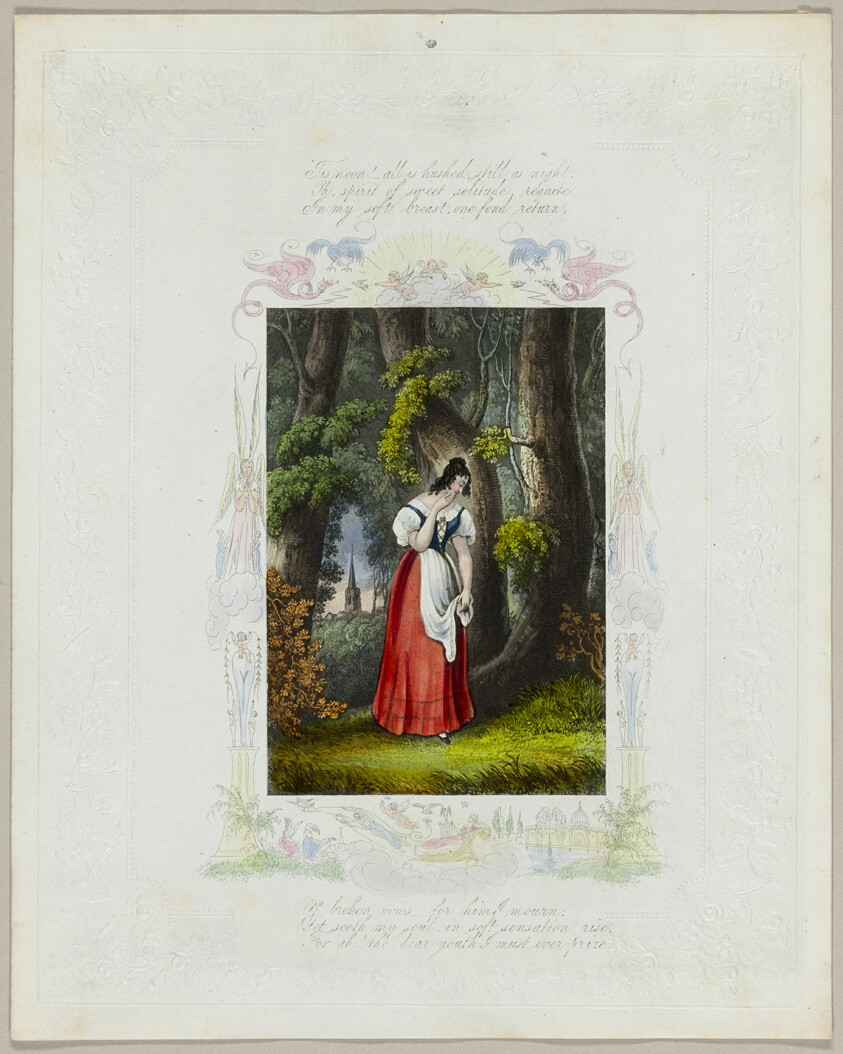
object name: Print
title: 'Tis Noon (valentine)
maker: Unknown Artist; English, 19th century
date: c. 1840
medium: Lithograph with hand-coloring on embossed off-white wove paper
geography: England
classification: valentine; prints and drawing; print